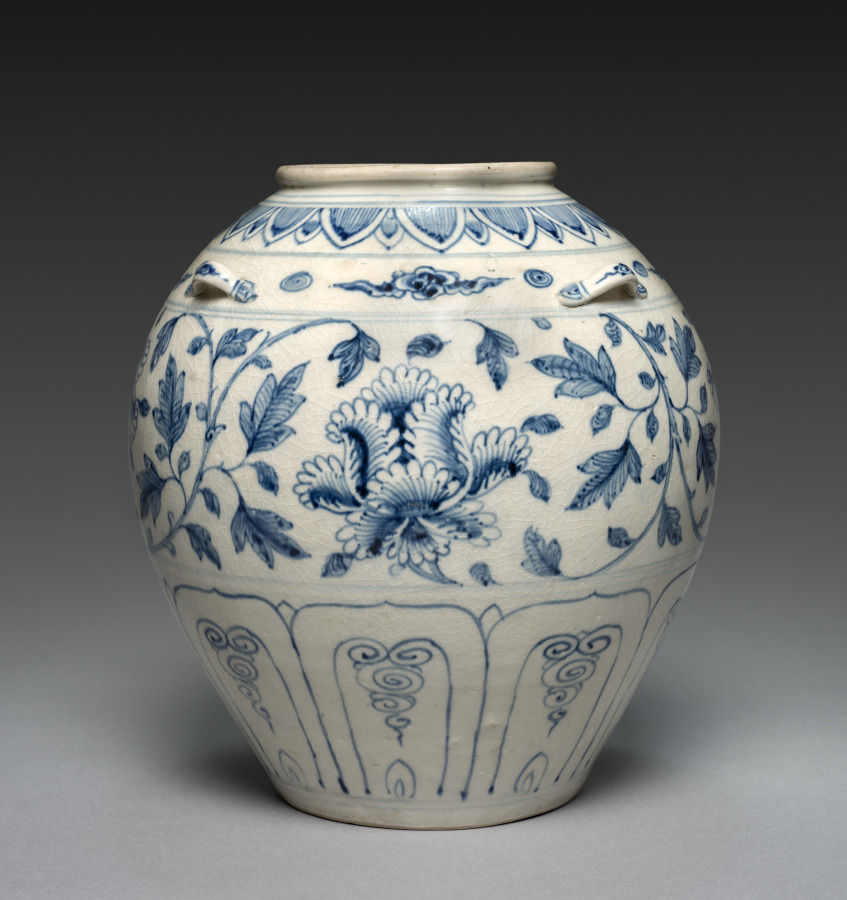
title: Storage Jar: Blue-and-White Ware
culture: Vietnam (Annam)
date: 1300s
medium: porcelain with underglaze blue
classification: Ceramic